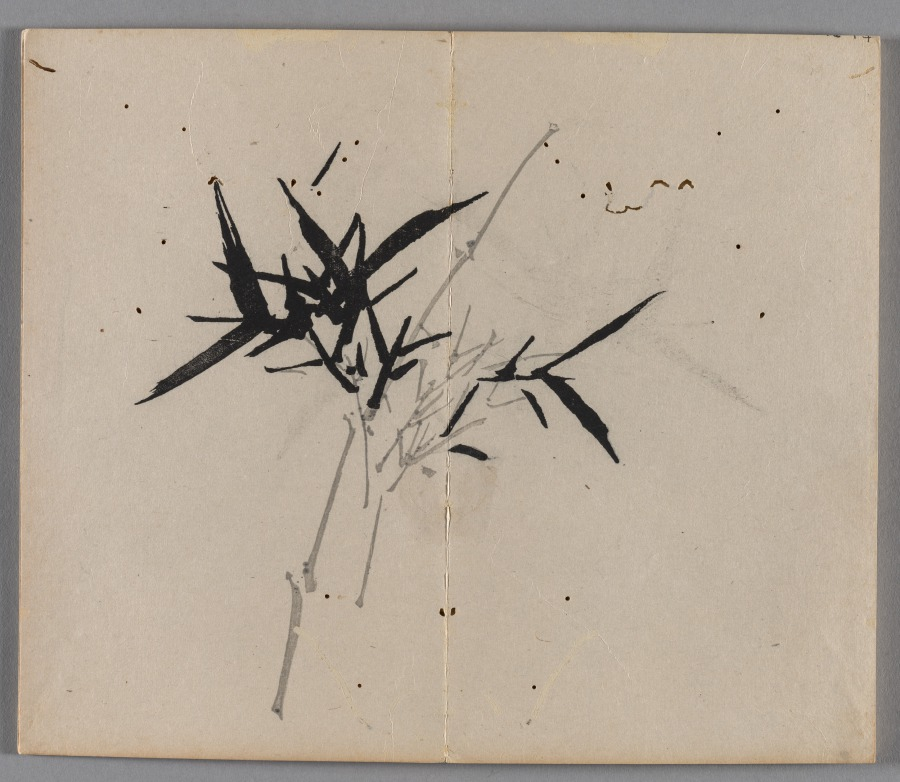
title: Ten Bamboo Studio Painting and Calligraphy Handbook (Shizhuzhai shuhua pu): Orchids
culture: China, Qing dynasty (1644-1911)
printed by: Hu Zhengyan (Chinese, c. 1584–1674)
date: 1633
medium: Woodblock-printed book; ink and colors on paper; first edition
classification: Print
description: Color printing reached a level of perfection in the early 1600s, as seen in this Ten Bamboo Studio Collection of Calligraphy and Painting and the Mustard Seed Garden Manual of Painting (printed 1679 and 1701). The painterly quality, precision in registering (aligning) the woodblocks, and harmonious colors made them the most successful color print editions in Chinese history. Both editions were printed and compiled in Nanjing, spread nationwide, and had a great impact on the arts in Japan and Korea.